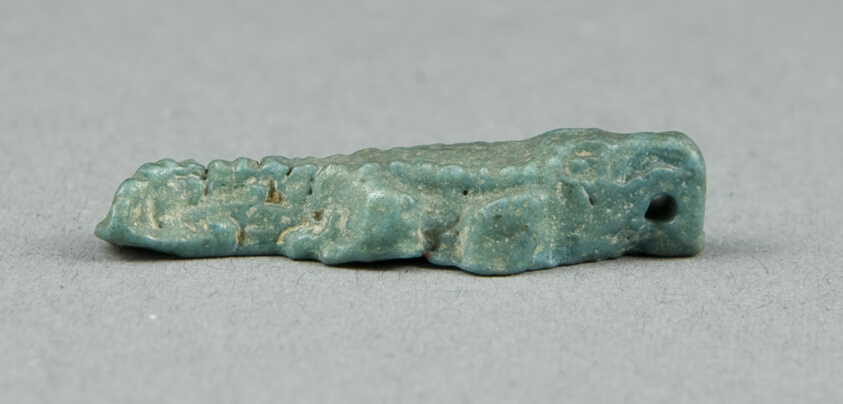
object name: Costume and Accessories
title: Amulet of a Crocodile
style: egyptian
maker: Egyptian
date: Third Intermediate–Late Period (about 1069–332 BCE)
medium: Faience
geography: Egypt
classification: amulet; jewelry; ceramics; ancient art; costume; faïence (composite material)